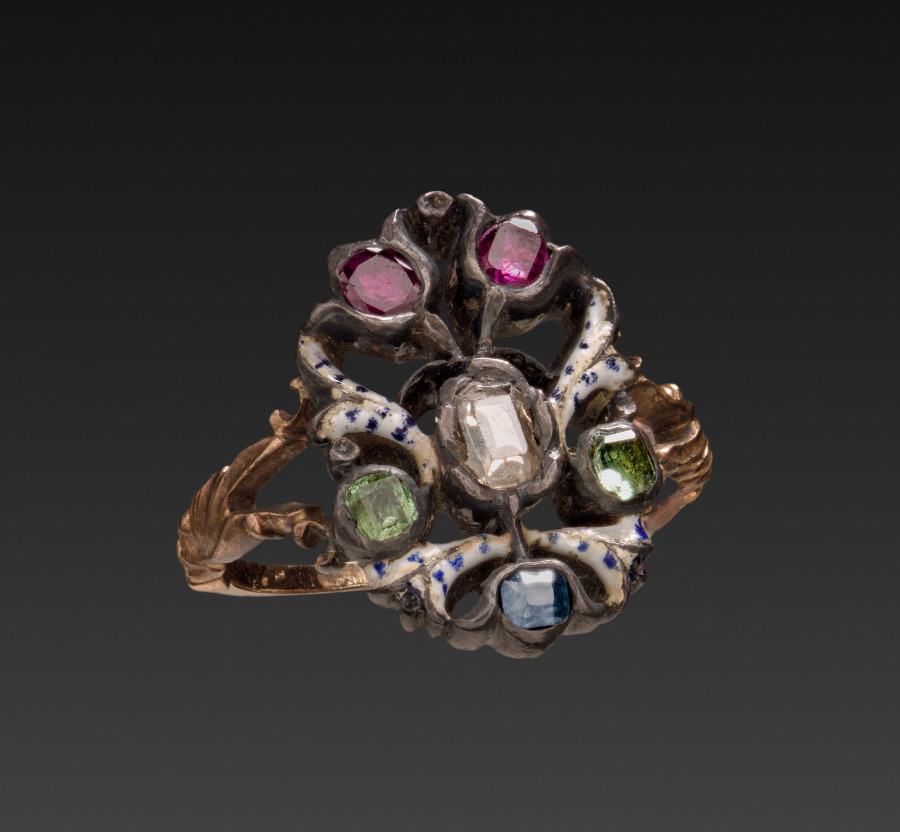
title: Ring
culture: Italy or France, 18th century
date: 1700s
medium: gold band, silver and enamel setting with diamond, ruby, emerald and garnet stones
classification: Jewelry